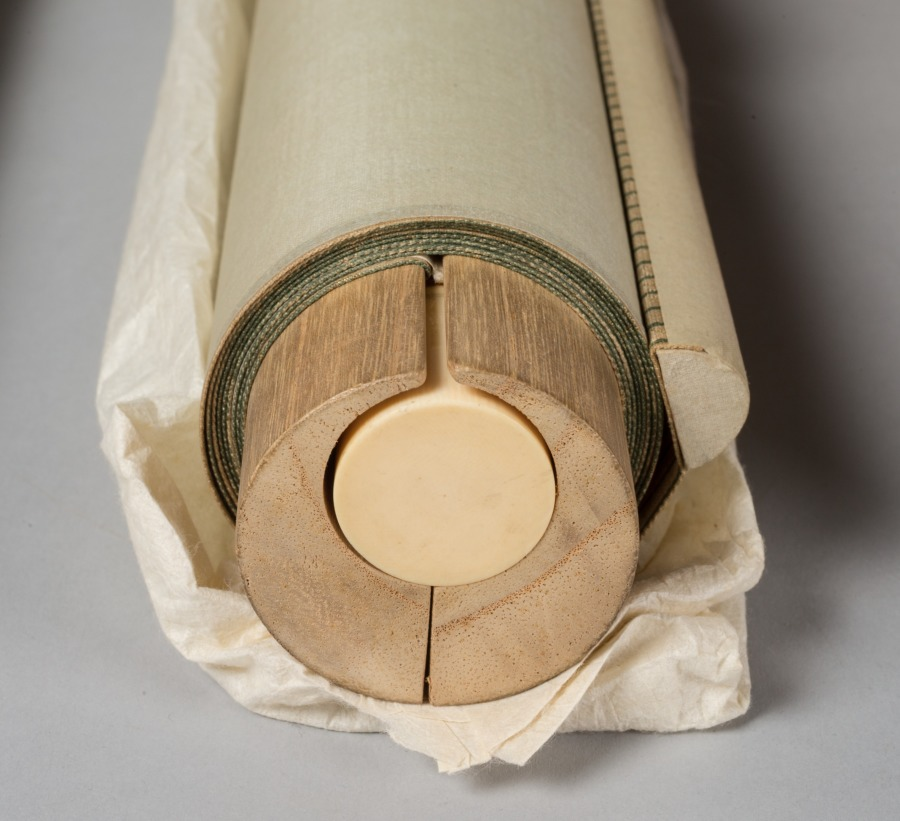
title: Scene from a Noh Play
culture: Japan, Edo period (1615–1868)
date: early 1700s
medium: hanging scroll; ink, color, and gold on paper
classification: Painting